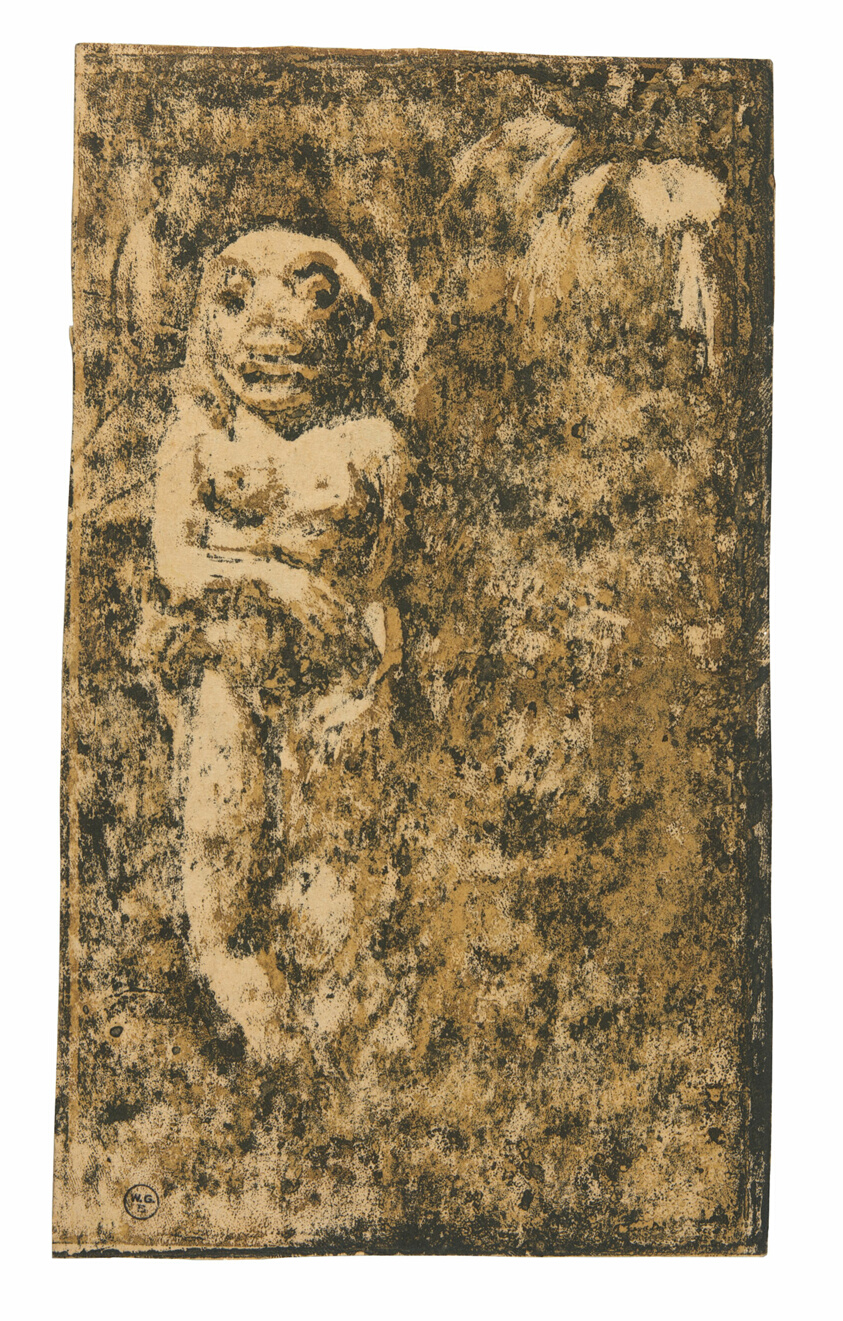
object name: Print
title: Oviri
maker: Paul Gauguin (French, 1848-1903)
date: 1894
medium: Wood-block print, printed twice in deep yellow ocher and black ink (recto); wood-block print in black ink over stenciled yellow ink and a red ink tone block (verso); on cream wove paper (an imitation Japanese vellum)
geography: France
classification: woodcut; print; prints and drawing